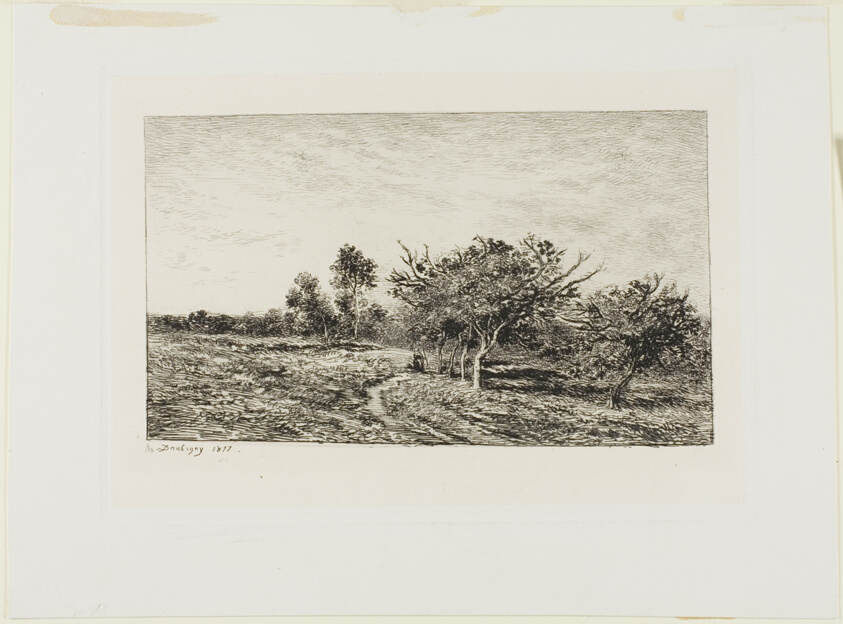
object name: Print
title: Apple Trees at Auvers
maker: Charles François Daubigny (French, 1817-1878)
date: 1877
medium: Etching on chine collé on paper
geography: France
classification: etching; print; prints and drawing